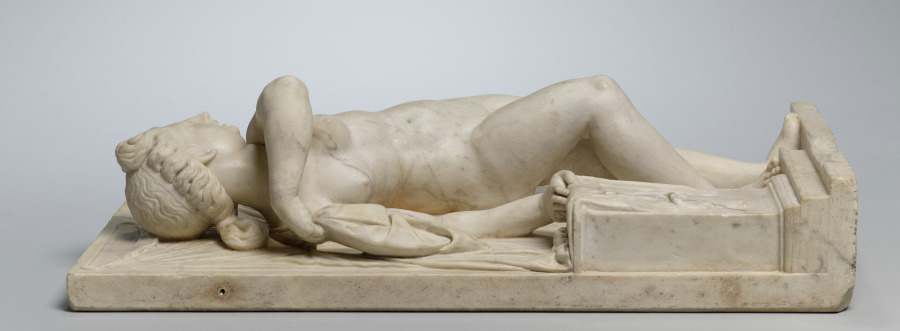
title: Dido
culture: Italy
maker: Aurelio Lombardo (Italian, 1501–1563)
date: c. 1525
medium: marble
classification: Sculpture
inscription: PVNICA SVM [DIDO ERE]XI QVAE MOENIA BYRSA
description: Artists customarily portrayed Dido as a forlorn lover abandoned by the Trojan hero, Aeneas, but here she is a conquering queen. Dido draws aside an oxhide curtain, a reference to the mythical founding of Carthage (in modern-day Tunisia, North Africa), when she was given an oxhide to demarcate granted land. By cutting it into thin strips she was able to encircle the future city. Dido was likely created for display in a studiolo, a place of study featuring refined works of art appreciated by humanist scholars and aficionados during the Renaissance.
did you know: Dido’s nudity and hairstyle are allusions to ancient Greek images of Aphrodite.